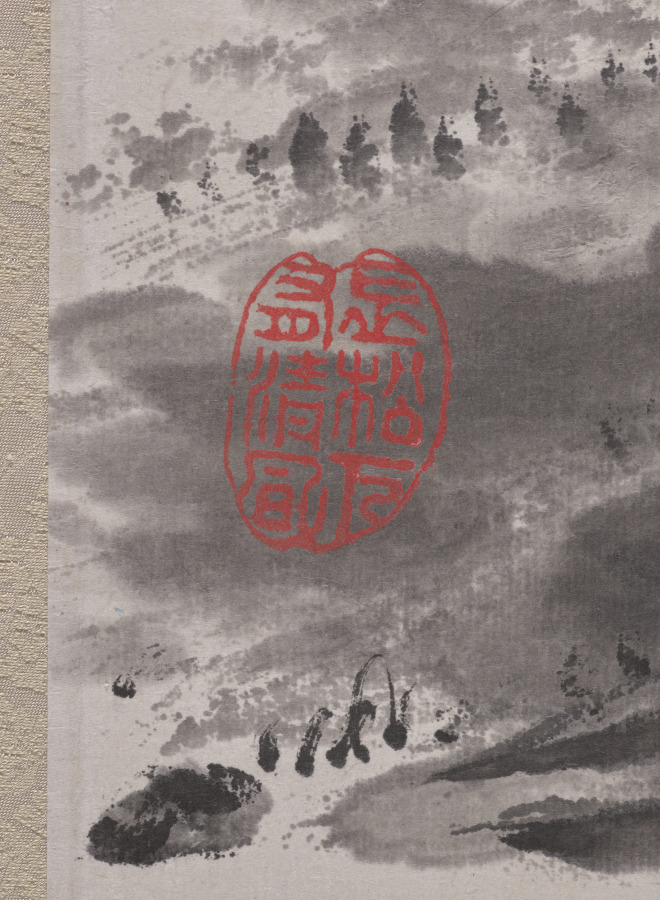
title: Rain Clearing over a Summer’s Mountain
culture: Japan, Meiji period (1868–1912)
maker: Seifū Yohei III (Japanese, 1851–1914)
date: 1893–1914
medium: hanging scroll; ink on paper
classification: Painting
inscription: The signed inscription by the artist in the painting’s upper right gives the title "Rain Clearing Over a Summer’s Mountain" and is accompanied by his Imperial Household Artist seal.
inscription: Artist's signature seal in the lower left on the grassy riverbank.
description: Before entering into his apprenticeship with Yohei II, Yohei III trained as a painter in Osaka. He continued to paint throughout his career as a ceramist. Yohei IV authenticated this painting as having been done by his father in a box lid inscription dated to the summer of 1919 . The signed inscription by Yohei III in the painting’s upper right gives the title Rain Clearing Over a Summer’s Mountain and is accompanied by his Imperial Household Artist seal. His signature seal is found in the lower left on the grassy riverbank. The composition follows a basic literati painting convention: it is divided into a foreground, middle ground, and background, with trees in the front, a temple in the middle, and mountains at the back. The brushwork, too, with its ovals of inkwash and dry-brushed dots and lines, has the casual feel of a painting made for one’s own amusement or dashed off for a friend. As part of his ceramic practice, Yohei III also made roller ends to be placed at either end of the wooden dowel around which the lower part of a hanging scroll mounting is wrapped. These served both as weights for the painting and as knobs for handling it when rolling and unrolling. The pair here, CMA 2022.152, is made of porcelain with a green glaze.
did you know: Seifū Yohei III studied to paint ink compositions in an abstracted, calligraphic way associated with well-read people who made paintings for their own amusement and as gifts for friends.